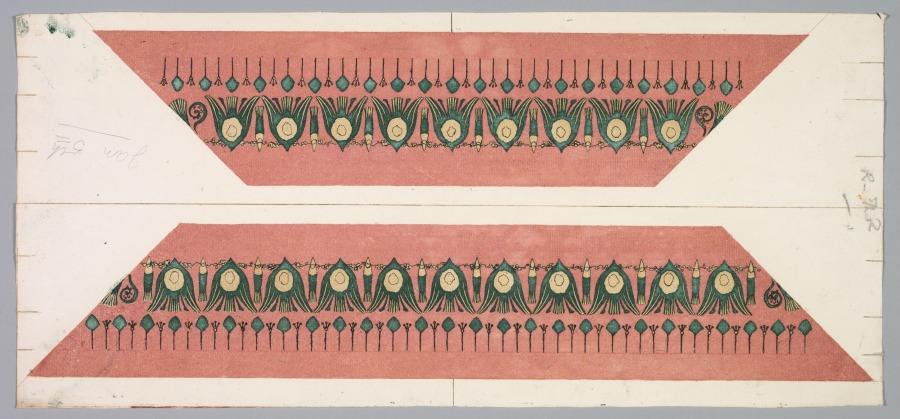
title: Embers Glow: Lotus Pattern Frame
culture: France, 19th century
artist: Theodore Roussel (French, 1847–1926)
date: 1890–1897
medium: color etching and aquatint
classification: Print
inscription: to right of lower image, in graphite: Jan 5th; left margin, center, in graphite: 9; R-7h R